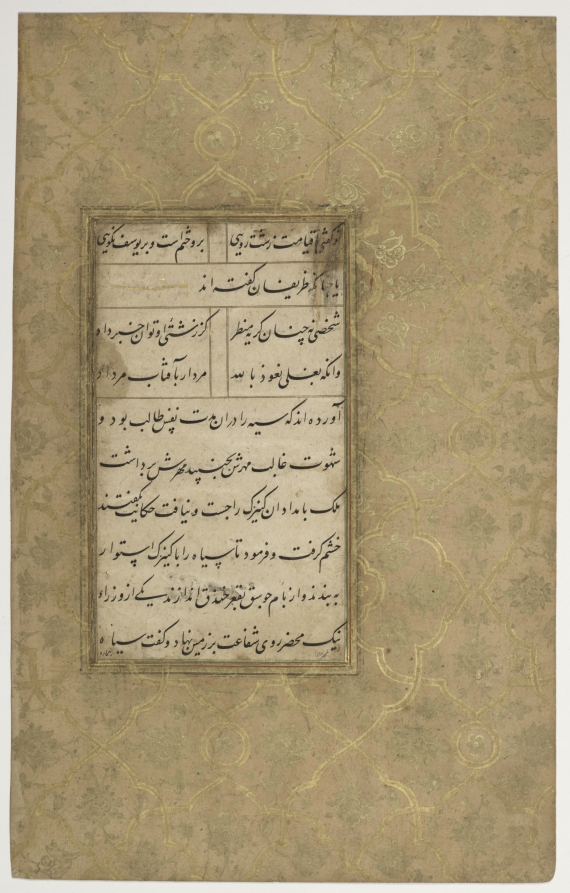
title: Illuminated folio (verso) from a Gulistan (Rose Garden) of Sa'di (c. 1213–1291)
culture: Iran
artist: Sultan 'Ali al-Mashadi (Iranian, 1430–1520)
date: calligraphy: c. 1475–1500; border: c. 1550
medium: Gum tempera, ink, gold, and silver on paper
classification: Manuscript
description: The border scene is set in a magical forest bursting with blossoms. At the top, a winged lion chases a winged deer, who is caught in the bottom border. The imagery of a lion biting down on its prey dates from the Achaemenid period in Iran (550–330 BCE) and references the valor of the king. A fox scurries off to the right. The verse is written in the Persian language using nastaliq script. Sultan ‘Ali Mashadi was widely renowned for perfecting the nastaliq script, and his calligraphy was a model for many followers across the Islamic world.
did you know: Meaning “rose bush” in Persian, the Gulistan is a collection of anecdotes in both verse and prose.